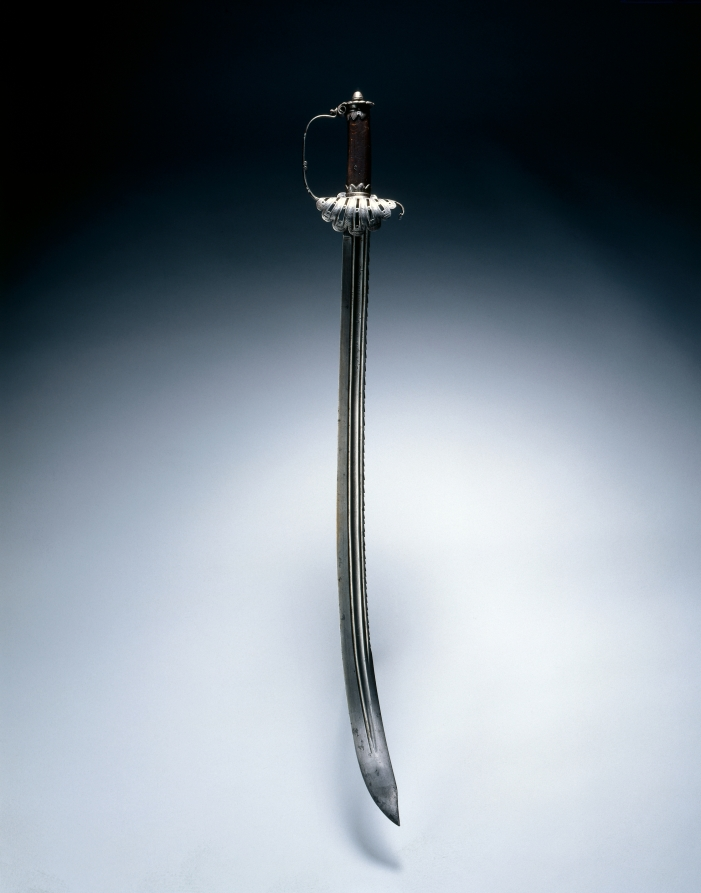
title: Hunting Sword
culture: Germany, Solingen, 17th century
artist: Clemens Willems (German)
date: c. 1630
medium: steel and wood, scroll ornaments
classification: Arms and Armor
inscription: inscribed on blade: CLEMENS WILLEMS/ FECIT SOLINGEN